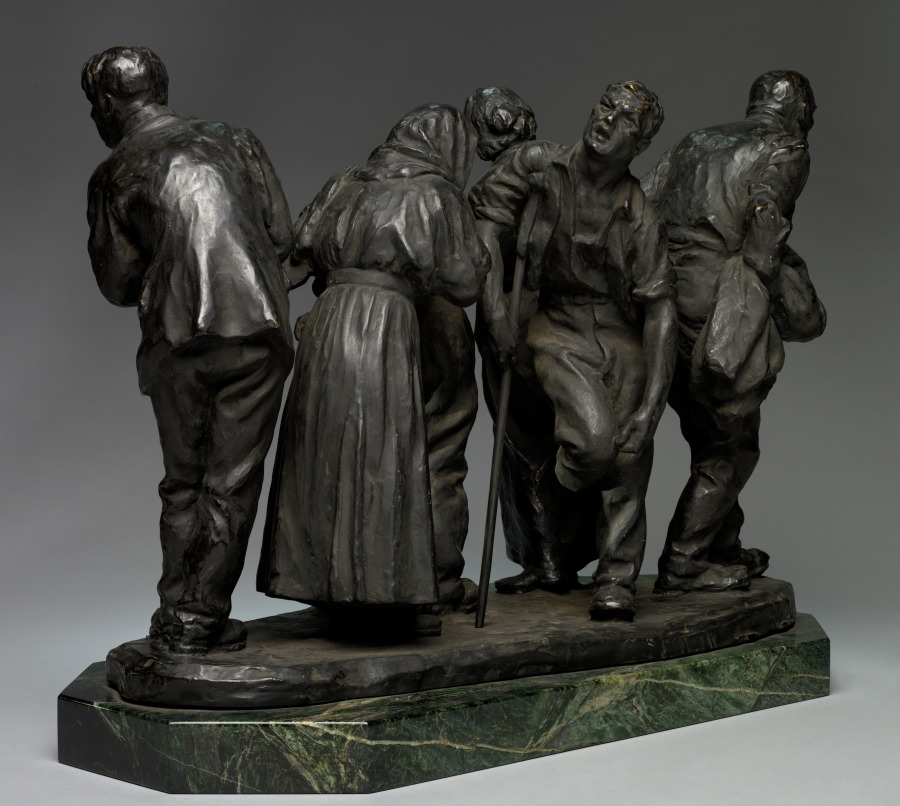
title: The Bread Line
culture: America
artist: Max Kalish (American, born Russian Empire [now Lithuania], 1891–1945)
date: 1926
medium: bronze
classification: Sculpture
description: Sculptor Max Kalish described his motivation behind creating The Bread Line: "My interest in making this group came to me gradually through years of concern with the question of unemployment and poverty." The sculpture's six figures were modeled separately, then arranged together to make the final composition.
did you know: The artist is buried in Mayfield Cemetery, Cleveland.